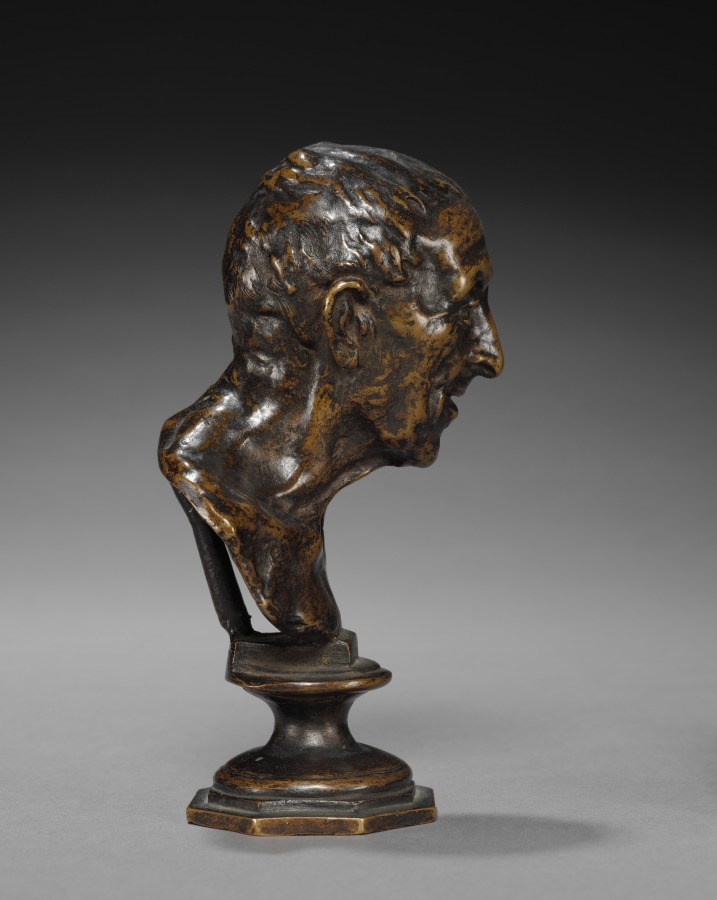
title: Head of a Man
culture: Italy, late 19th-early 20th century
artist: Vincenzo Gemito (Italian, 1852–1929)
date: c. 1875 – 1929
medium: bronze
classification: Sculpture